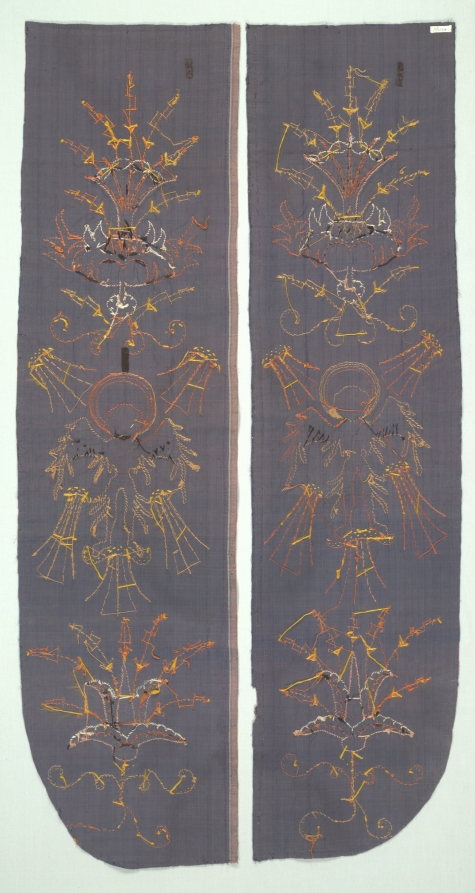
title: Part of a Chasuble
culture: England, London (embroidery) and Italy, Florence (velvet), early 16th century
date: c. 1500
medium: Silk, gold filé; appliqué, embroidery: couching stitches Velvet: solid pile, silk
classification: Embroidery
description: Although missing the central decorative band, these two velvet panels embroidered with angels and thistles originally formed part of the back of an ecclesiastical chasuble. The term opus anglicanum, or English work, refers to English embroidery dating from the 1100s through the 1500s, like this example. Made primarily in embroidery guilds in London, it was in great demand for royal and ecclesiastical garments and furnishings throughout Europe.